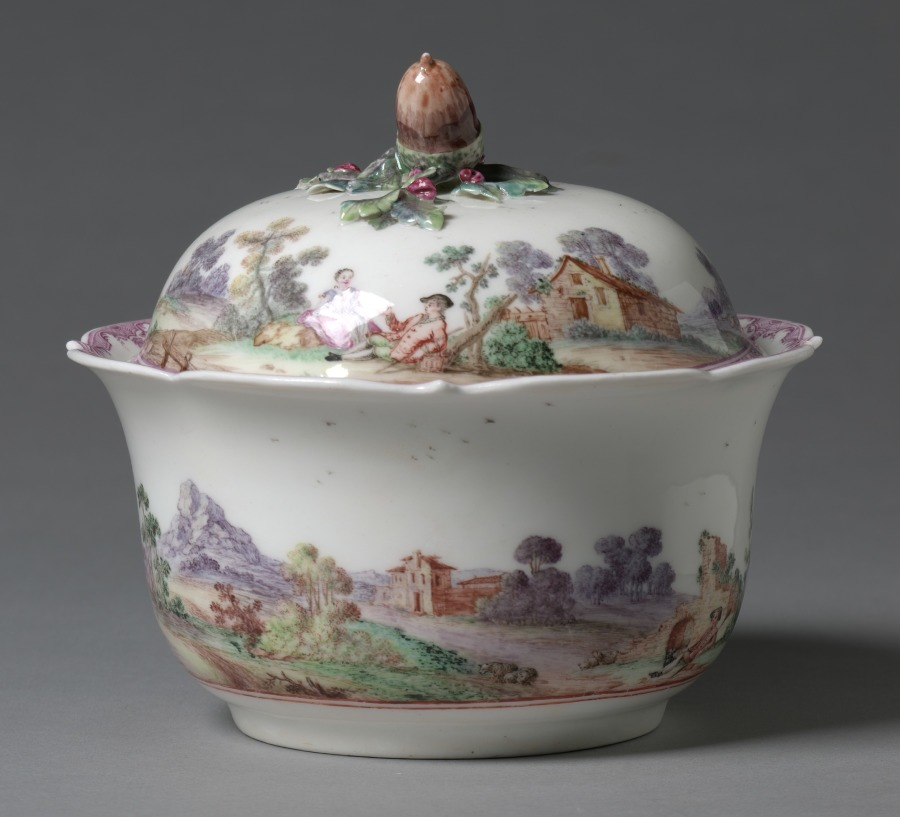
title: Covered Sugar Bowl (Pot à sucre)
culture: France, Vincennes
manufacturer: Vincennes Porcelain Manufactory (French, 1740–1756)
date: 1745–48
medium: soft-paste porcelain with enamel decoration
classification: Ceramic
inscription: In red on bottom of bowl: P.M. In red on interior of lid: P.M. 16 4.8B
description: This covered bowl, likely intended for sugar, is one of the earliest surviving examples of Vincennes porcelain, a reputed French factory moved to Sèvres in 1756. The continuous landscape is painted on this object en pointillé, a method by which a painter forms images with tiny dots. This style may have been influenced by their German competitors at the Meissen Porcelain Factory.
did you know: Three separate shades of purple, one of the most expensive colors to produce on porcelain during this time, are used extensively in this object’s paintings.